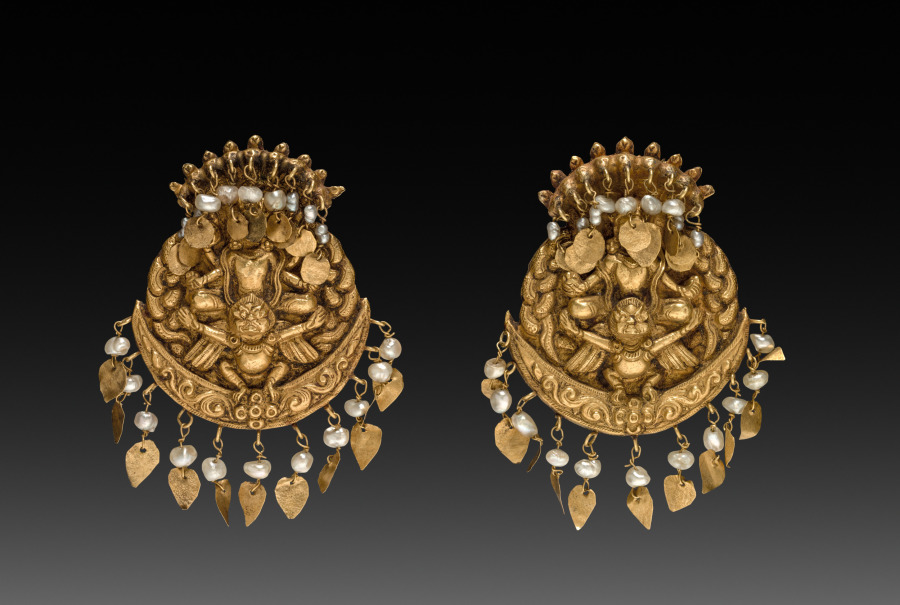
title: Pair of Earrings with Four-Armed Vishnu Riding Garuda with Nagas (serpent divinities)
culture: Nepal, Kathmandu Valley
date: 1600s or 1700s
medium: repousse gold with pearls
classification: Jewelry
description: In Nepal, sculptures of deities were adorned with jewelry larger than pieces made for human beings. This pair of earrings features the Hindu god Vishnu seated cross-legged riding his mount the man-eagle Garuda. Garuda's arms are outstretched, grabbing the tails of serpents whose braided bodies snake up both sides of each earring. His wings drape like a cape behind him, and his talons clutch his crescent moon perch. Serpent hoods rise up behind Vishnu like a canopy.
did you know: Vishnu and Garuda are solar deities, and they sit on the crescent moon, so the light of both celestial bodies shines from these earrings.